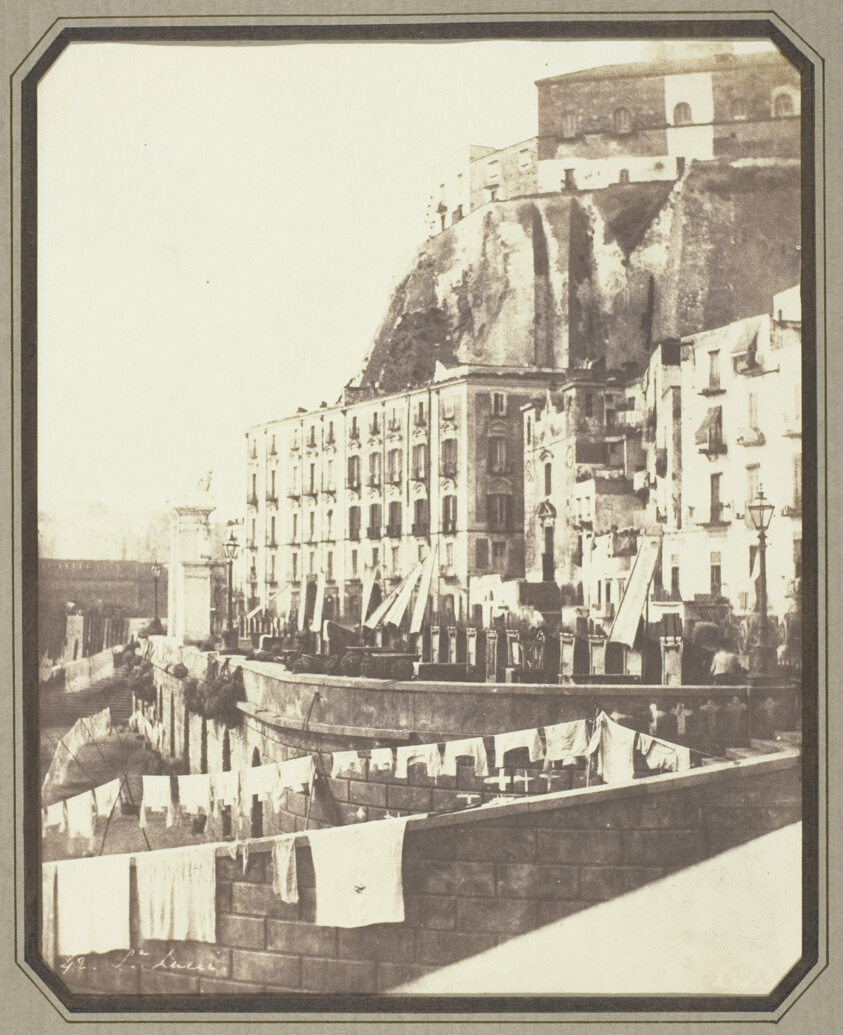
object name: Photograph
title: St. Lucia, Naples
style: 19th century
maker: Rev. Calvert R. Jones (Welsh, 1804–1877)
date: 1846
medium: Salted paper print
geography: Wales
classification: salted paper print; photographic process; photography; photograph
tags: Collected by Hugh Edwards